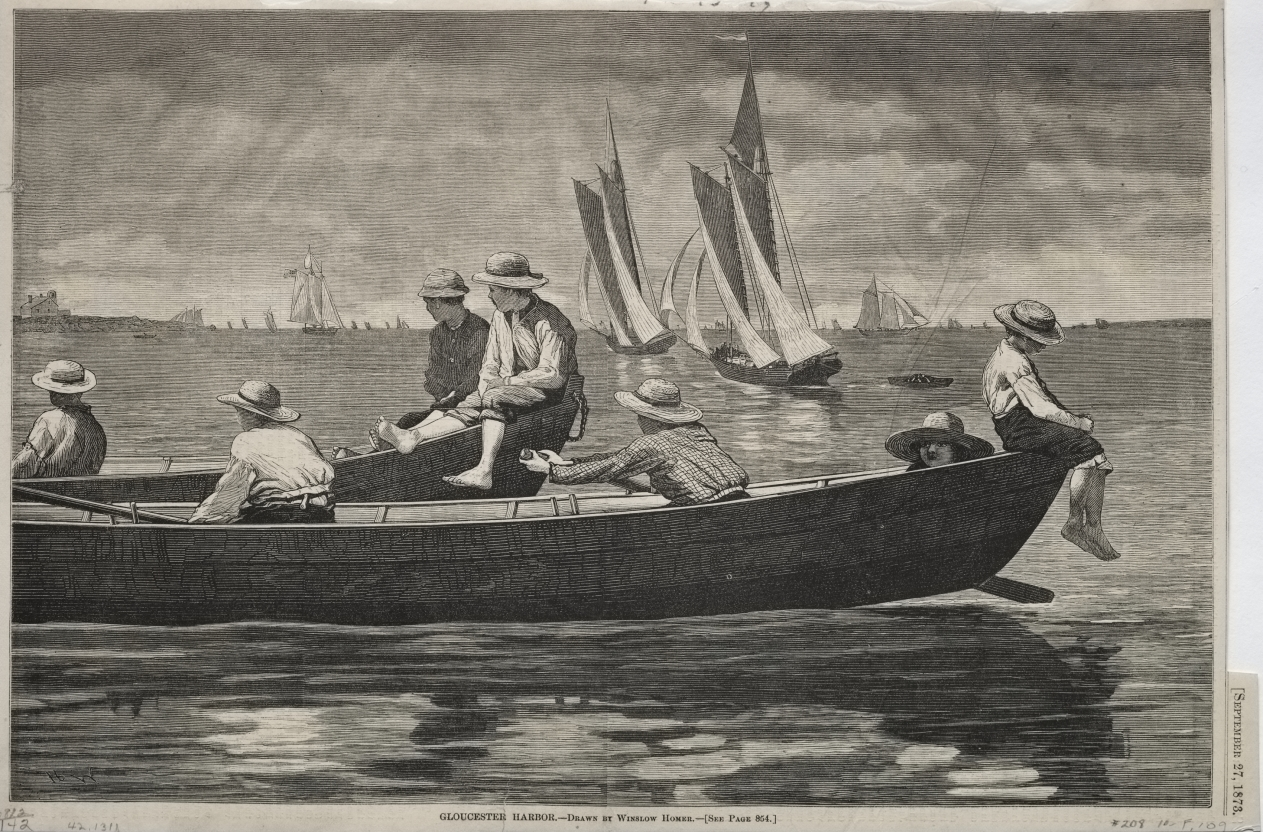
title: Gloucester Harbor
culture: America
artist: Winslow Homer (American, 1836–1910)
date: 1873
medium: wood engraving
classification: Print